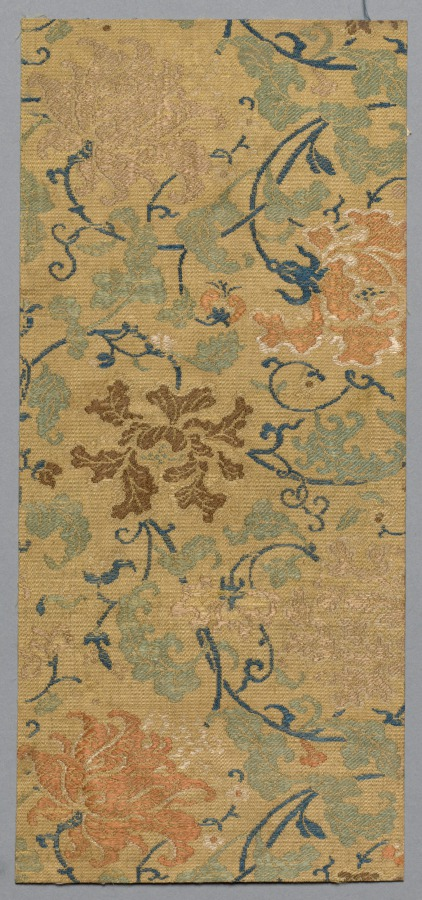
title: Fragment from Book of Textiles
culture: China, Qing dynasty (1644-1911)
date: 1700s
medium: satin ground; silk diasper weave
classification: Textile